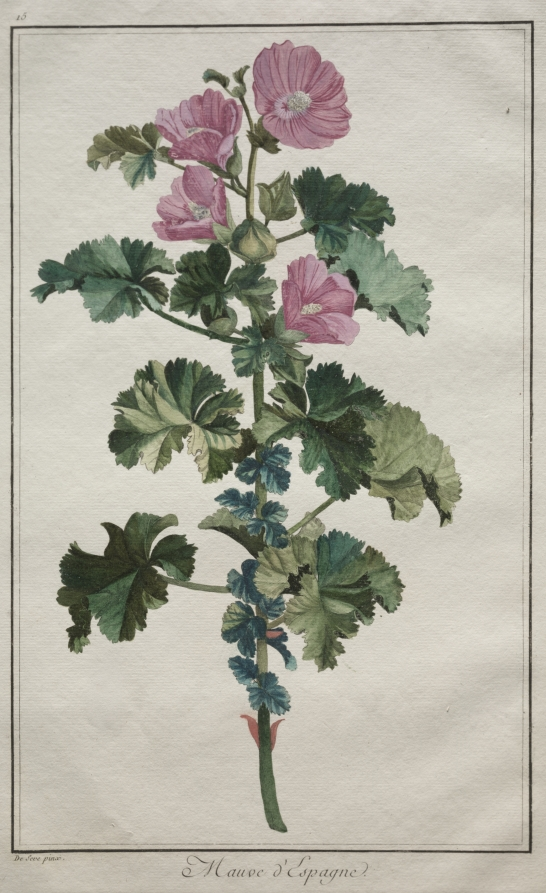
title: Recueil de vingtquatre plantes et fleurs: Mallow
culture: France, 18th century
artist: de Seve (French)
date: after 1772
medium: engraving, hand-colored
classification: Print